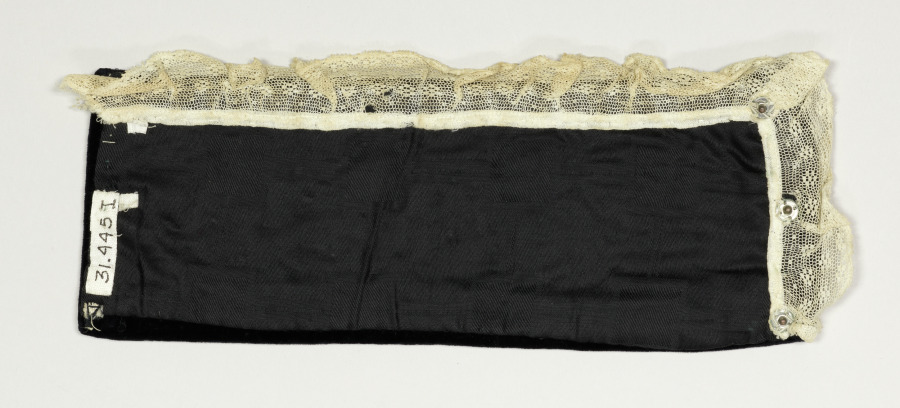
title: Woman's Costume (Cuff)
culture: Italy, Sicily, 19th century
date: 1800s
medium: velvet (black) with metal thread embroidery and lace edging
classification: Garment